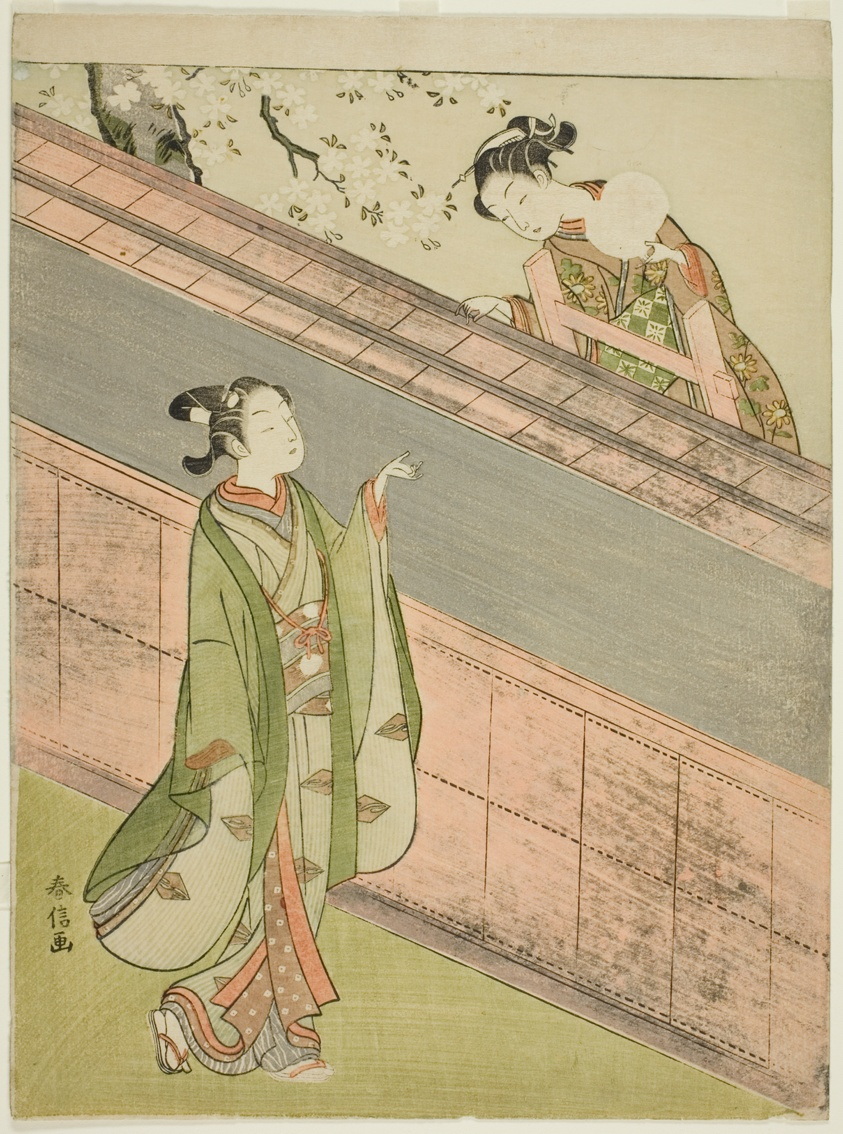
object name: Print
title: A Young Woman Returning a Ball to a Young Man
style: Japanese (culture or style)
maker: Suzuki Harunobu 鈴木 春信; Japanese, 1725 (?)-1770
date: c. 1767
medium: Color woodblock print; chuban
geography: Japan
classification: woodblock print; print; asian art